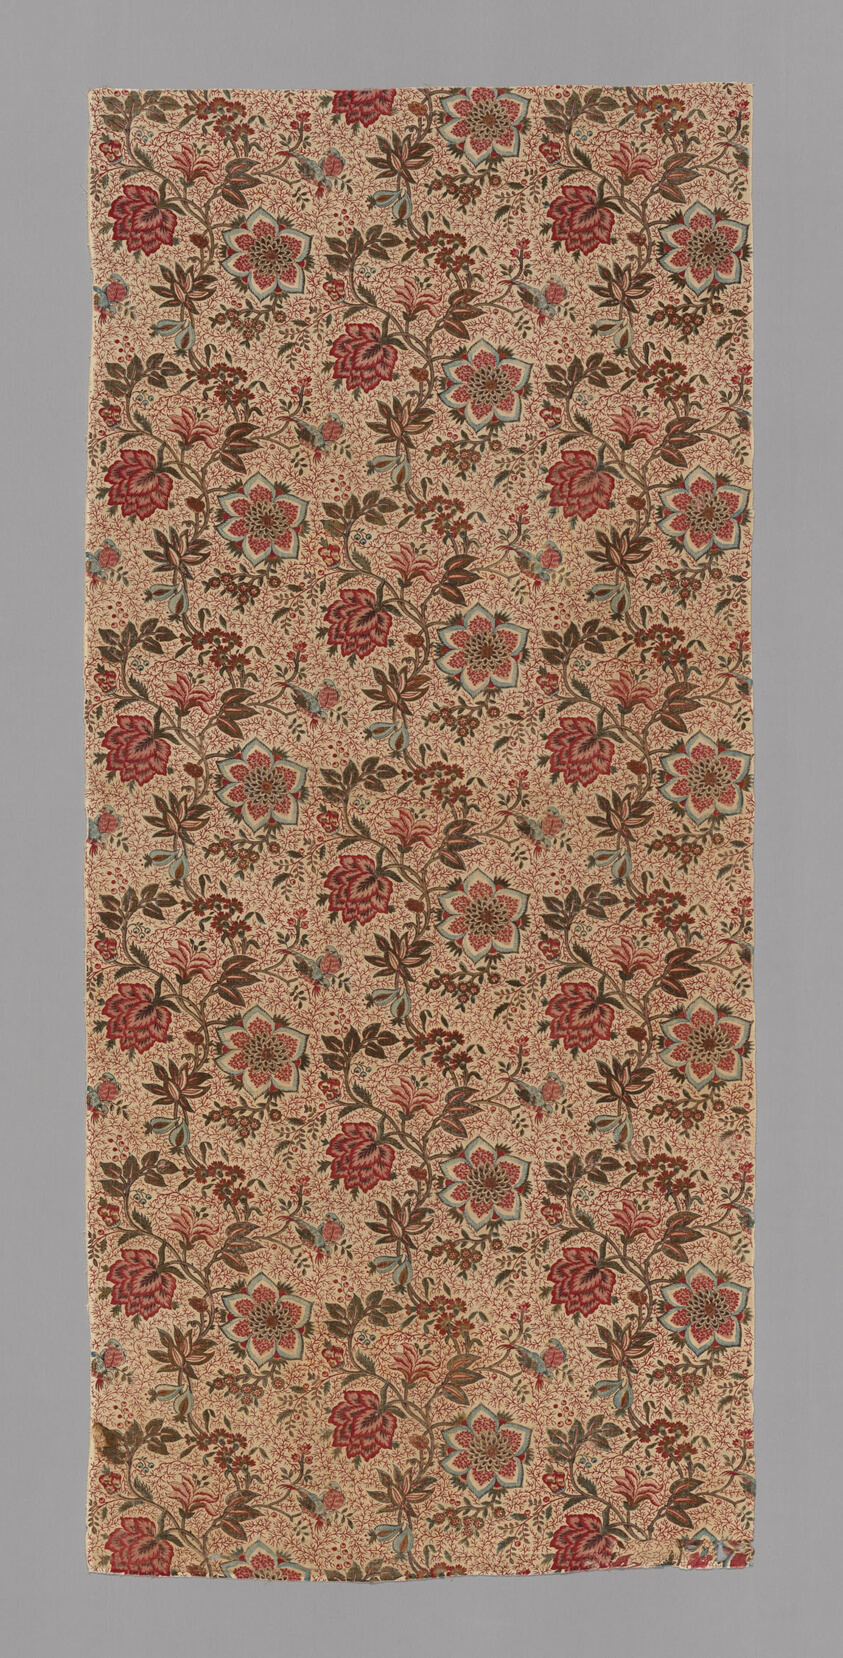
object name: Textile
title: Panel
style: jouy-en-Josas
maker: France, probably Jouy-en-Josas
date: 1780s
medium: Linen and cotton, plain weave; block printed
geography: France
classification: textile; weaving - printed; weaving